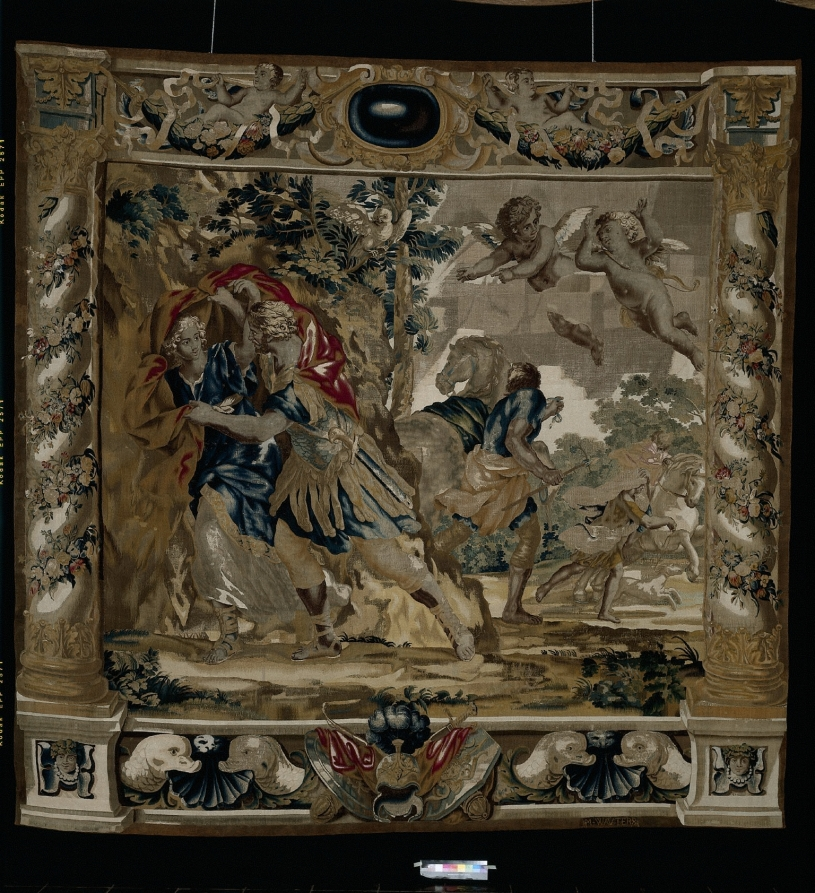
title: Dido and Aeneas seek shelter from a storm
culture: Belgium, 17th century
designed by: Giovanni Francesco Romanelli (Italian, 1610–1662)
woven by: Michael Wauters (Flemish, 1679)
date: 1679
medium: tapestry weave: silk and wool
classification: Tapestry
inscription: signed lower right: M. Wavters.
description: During a hunting party, Dido and Aeneas are caught in a storm and flee to shelter. Cupid and Hymen, the god of marriage, bless them from above. Servants are working to attend to the frightened horses while on a branch, the owl of evil beats his wings ominously.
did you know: This tapestry is one from a series of eight that depicts the tragic love story of Dido and Aeneas. They were gifted to the museum for display in the armor court.